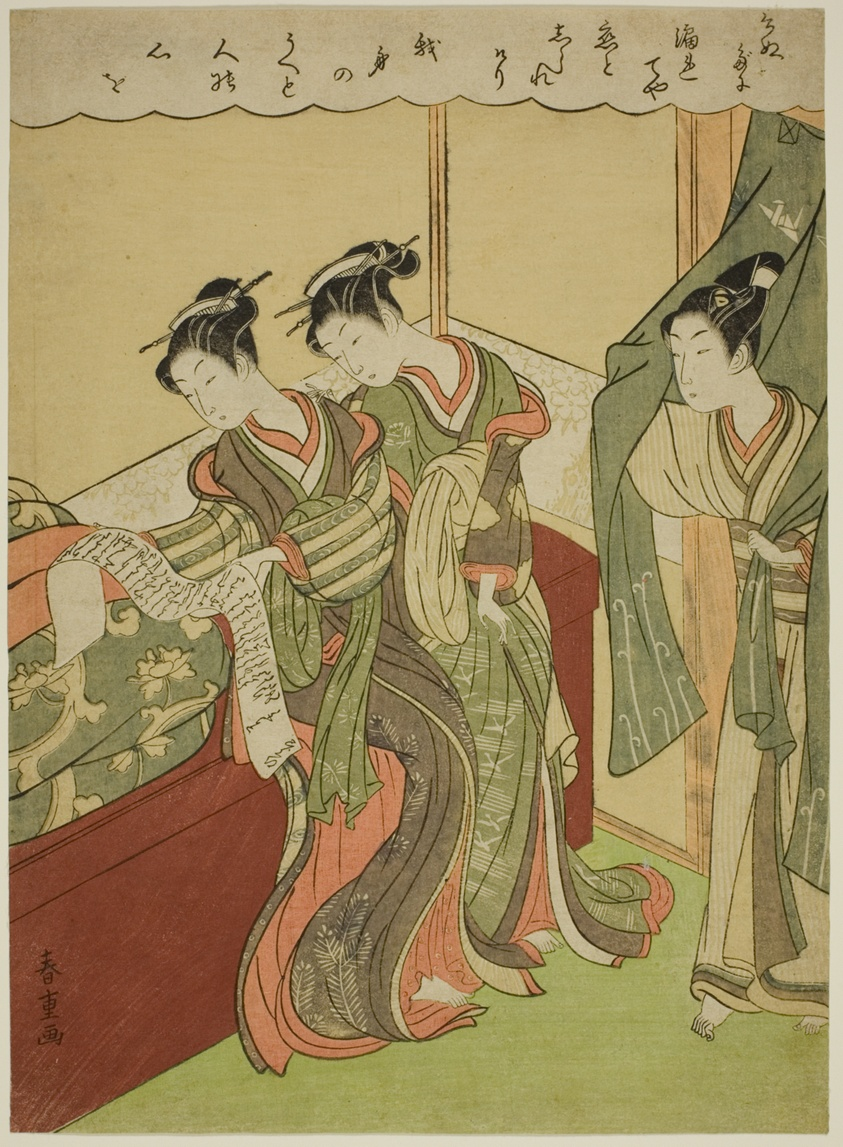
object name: Print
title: Young Man Walks in as Two Courtesans Read Love Letter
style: Japanese (culture or style)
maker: Shiba Kokan (Suzuki Harushige); Japanese, 1747–1818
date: c. 1772/74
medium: Color woodblock print; chuban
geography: Japan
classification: woodblock print; print; asian art